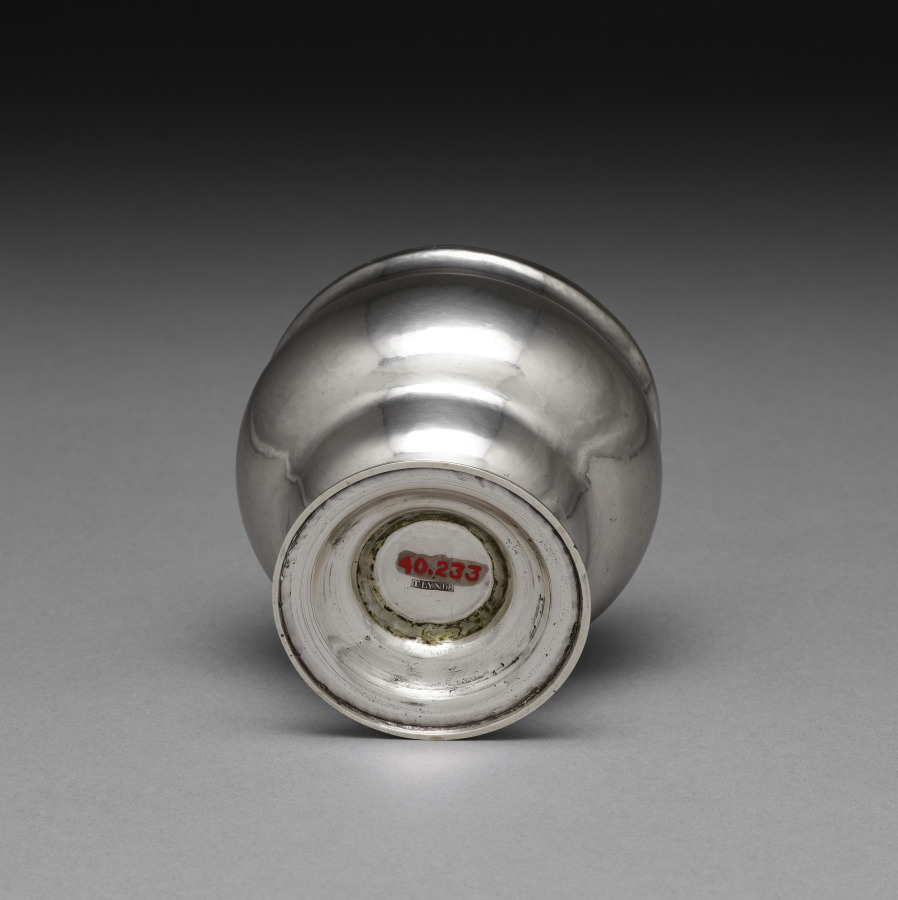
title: Sugar Bowl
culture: America, Massachusetts, 18th century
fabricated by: Thomas Lynde (American, 1748–1811)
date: c. 1770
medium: silver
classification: Silver